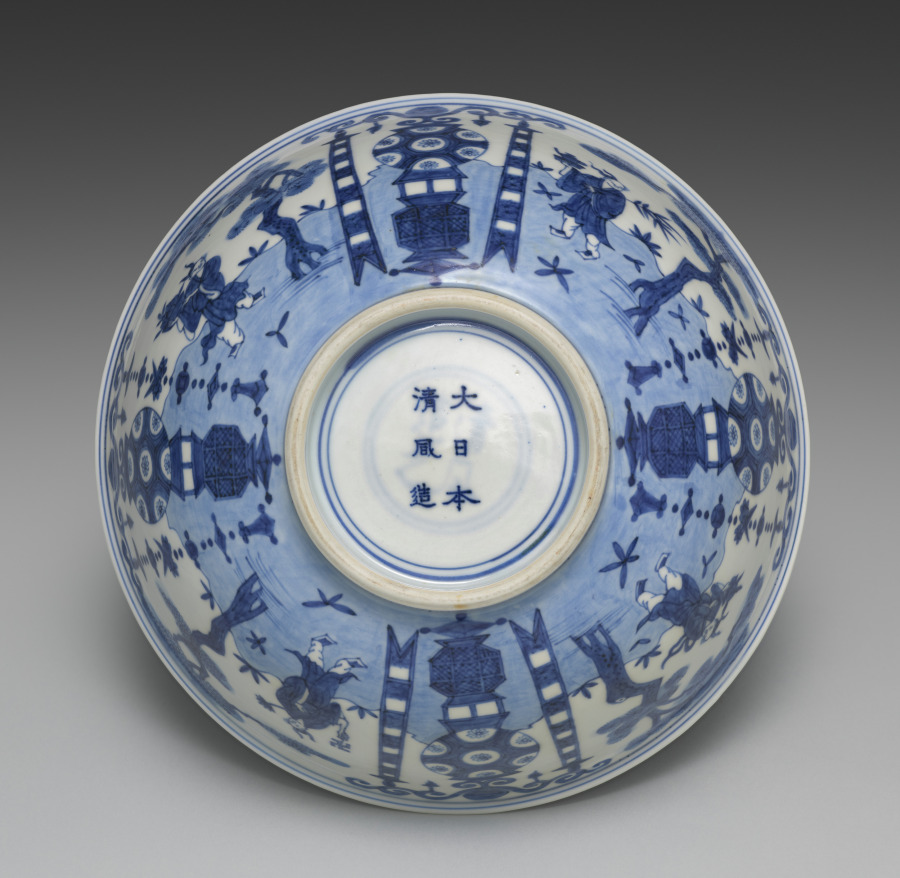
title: Bowl from Nesting Bowls with Daoist Immortals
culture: Japan, Meiji period (1868–1912)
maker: Seifū Yohei III (Japanese, 1851–1914)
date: 1893–1914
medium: Outer bowl from a set of three bowls; porcelain with underglaze blue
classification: Ceramic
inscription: 清風与平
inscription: 大日本清風造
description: Yohei III was capable of ink painting–like compositions in underglaze blue, as well as more decorative ones like that on this set of three nesting bowls. Bowls with very similar designs in five colors were produced in the reign of the Wanli emperor (r. 1572–1620) during the Ming dynasty, and Yohei must have had direct access to one of these or to a close copy. A scene of Daoist immortals is presented on the bowls. On each one, the ground plane is defined with a blue wash. Four lanterns are evenly spaced around the bowl. Two are flanked with linked-piece metalwork banners of the seven treasures. The alternate altars are adorned with textile banners. In between them are four immortals, each standing beneath a tree with small plants surrounding his feet. Two of the immortals hold fruit on a tray. Another carries an elixir-filled ewer and a willow branch. The fourth holds a swastika (manji), here an auspicious symbol, and a flower. Curiously, the inscription inside each footring reads “Made by Seifu of Great Japan,” in emulation of the dynasty and reign inscriptions that appear on Chinese ceramics; however, one can also see through the translucent glaze another inscription, “Seifu Yohei,” written in large characters within a double band of blue on the largest bowl.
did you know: In the bottom of each bowl is a scene of two robed immortals who appear to stand on a precipice in a mountainous landscape high in the clouds, with celestial orbs over their heads.